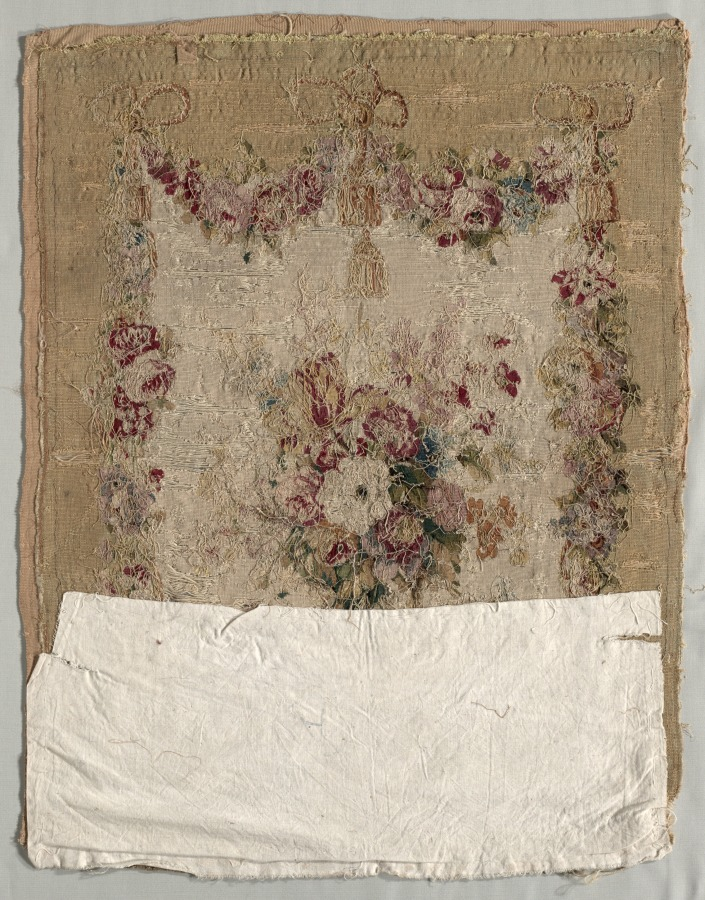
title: Textile Panel for Fire Screen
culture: Unassigned, Unassigned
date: c. 1780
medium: tapestry weave, wool warp (gold and beige), silk weft (polychrome)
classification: Textile